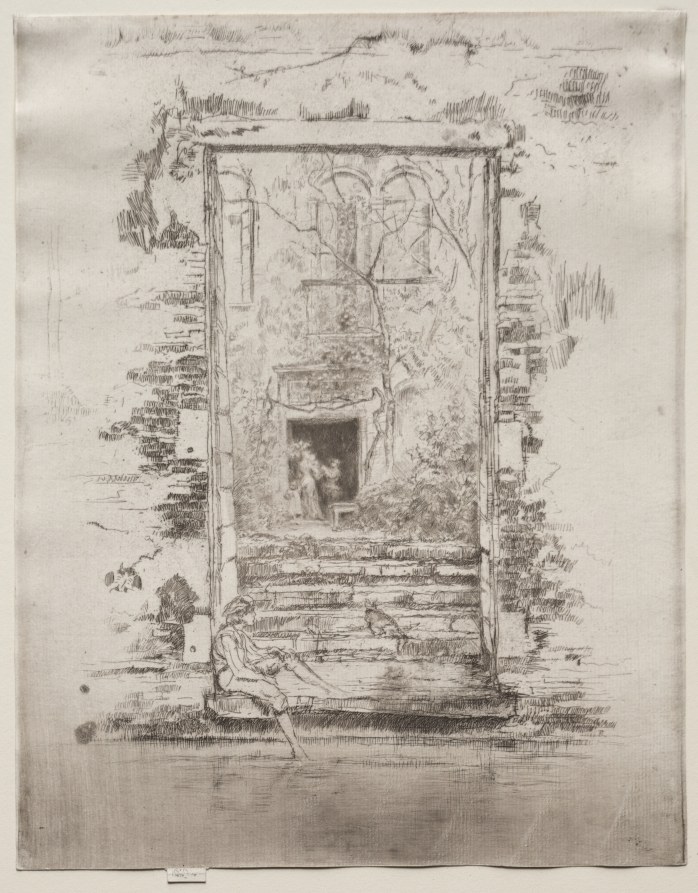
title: Garden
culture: America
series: Second Venice Set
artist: James McNeill Whistler (American, 1834–1903)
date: 1880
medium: laid paper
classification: Print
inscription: inscribed, in pencil, on rectangular tab along lower margin: butterfly monogram